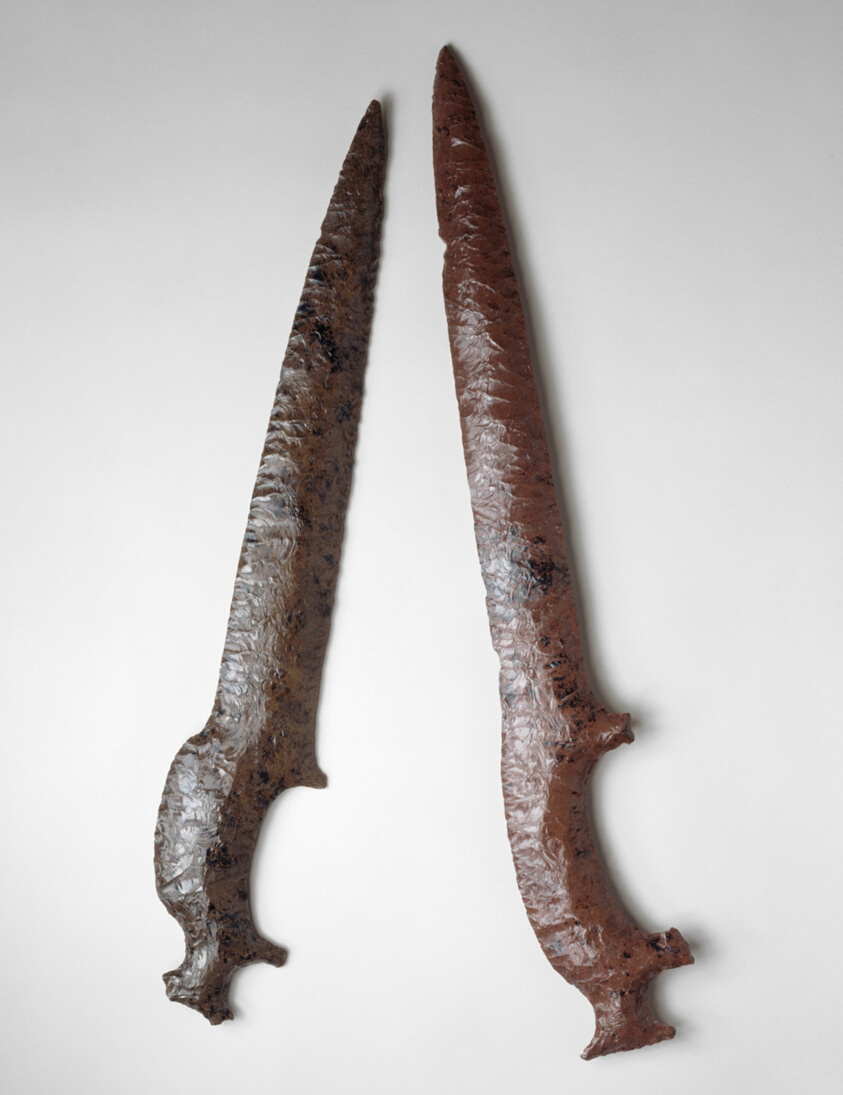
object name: Sculpture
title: Ceremonial Knife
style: colima, americas, mesoamerican, west mexico, Arts of the Americas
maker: Colima (Colima, Mexico)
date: c. 200 CE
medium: Obsidian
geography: Colima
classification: stone; art of the americas; ceremonial object; sculpture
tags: ceremonial objects, weapons